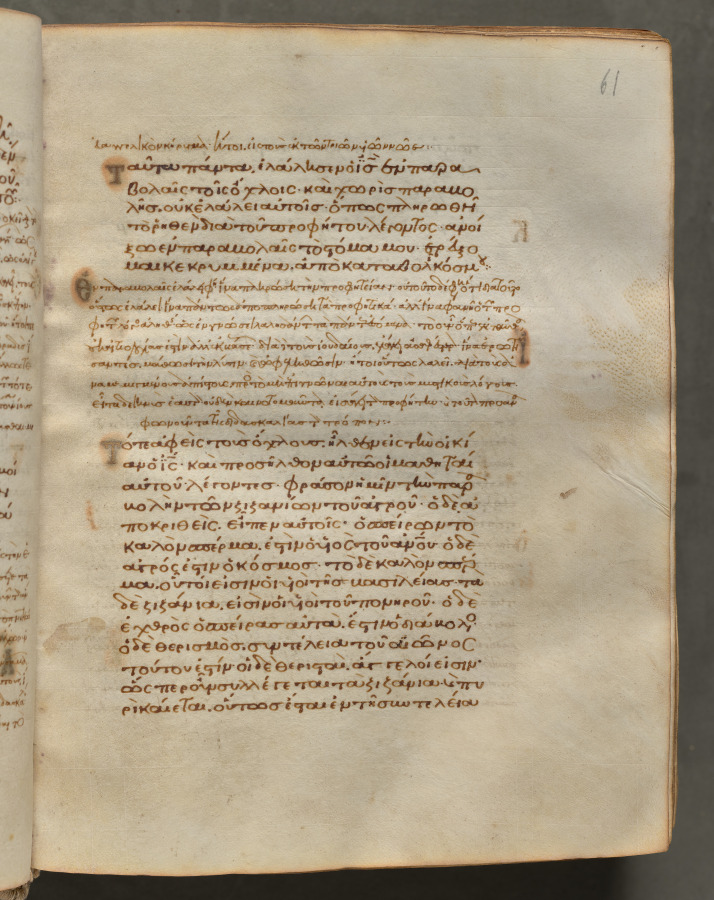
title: Text, folio 61 (recto), from a Gospel Book with Commentaries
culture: Byzantium, Constantinople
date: c. 1000–1100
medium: ink, tempera, and gold on vellum; leather binding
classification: Bound Volume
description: Each of the four gospels in this book opens on a page with brilliantly illuminated borders depicting the author of the text as well as birds-principally peacocks, symbols of the immortality of the soul-and fountains, representing the fountain of life and the salvation of the soul. This volume consists of 428 leaves with texts in Greek. Its level of sophistication suggests that it was probably written and decorated in a monastery in Constantinople.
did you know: Gospel Books were carried in procession through Byzantine churches.